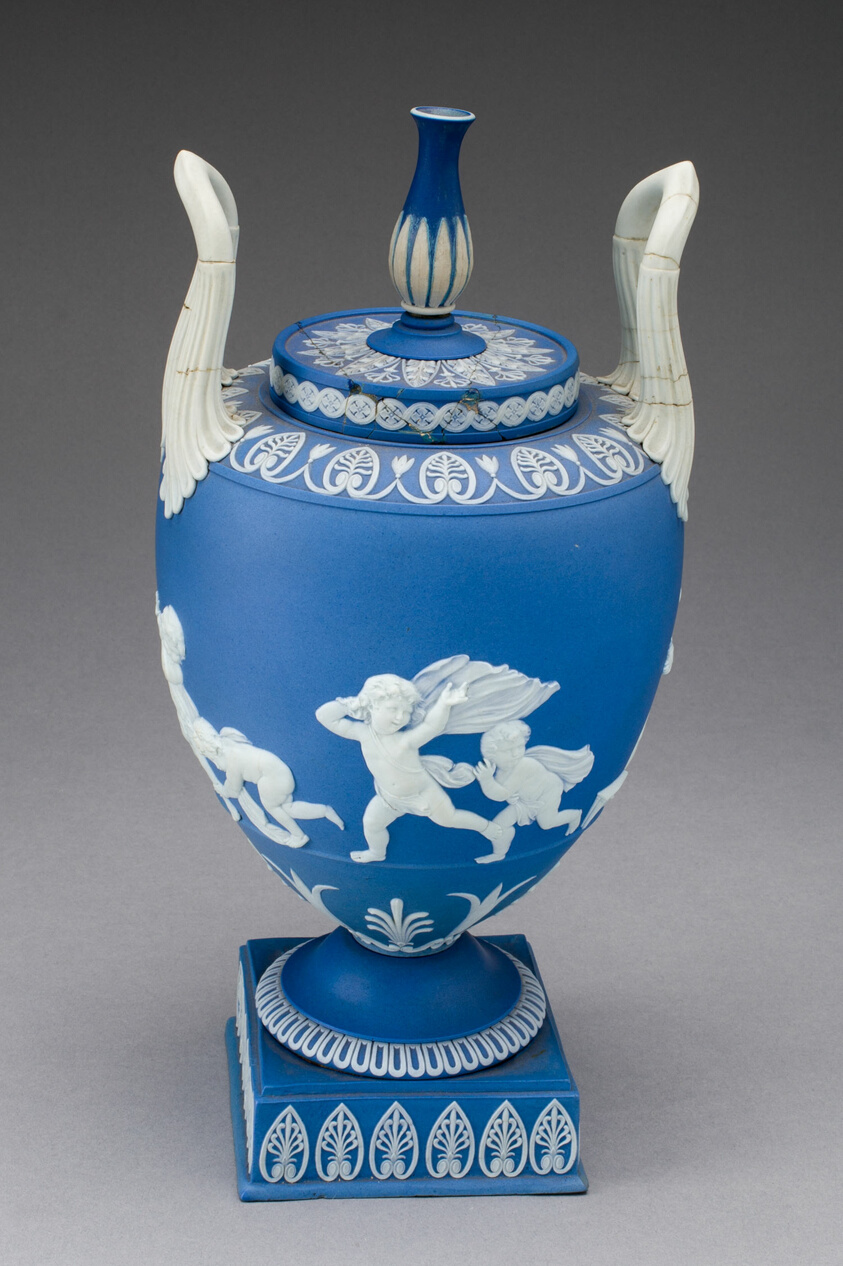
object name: Ceramics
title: Vase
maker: Wedgwood Manufactory (England, founded 1759)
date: c. 1850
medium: Stoneware (jasperware)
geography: Burslem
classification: vase; vessel; ornamental piece; stoneware; european decorative arts; ceramics